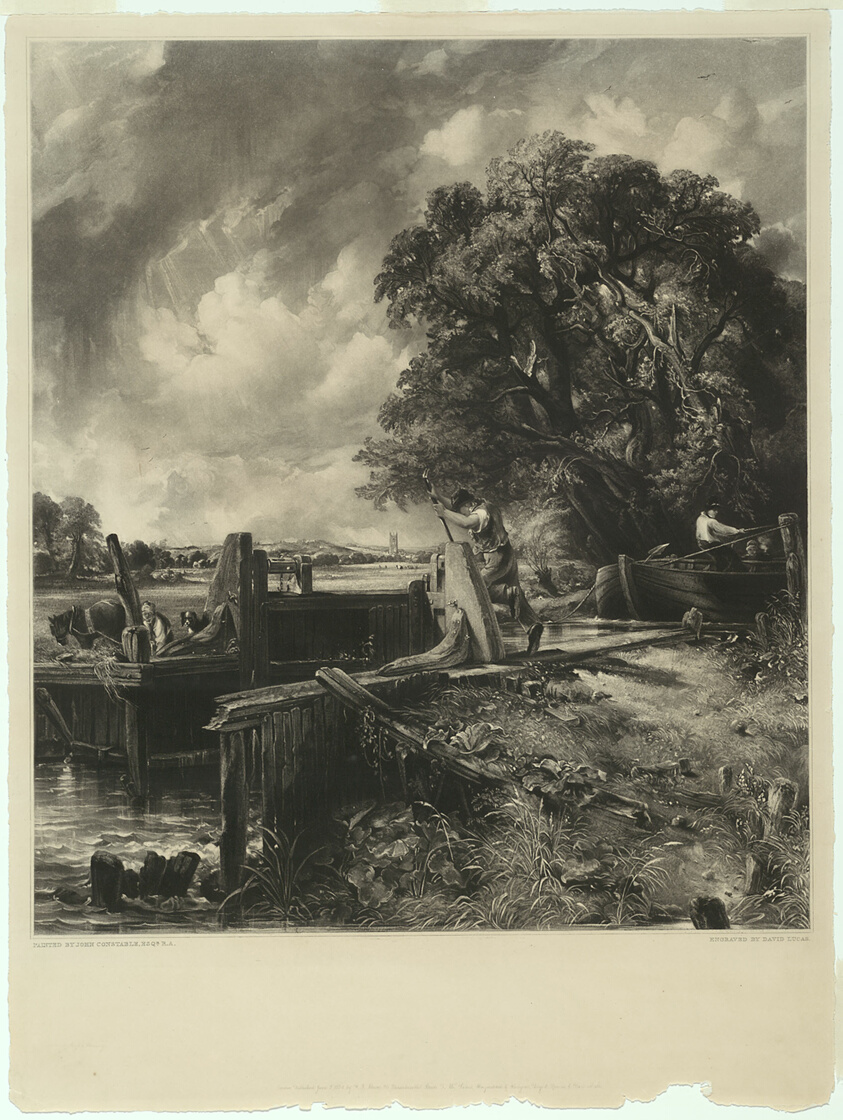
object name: Print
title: The Lock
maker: David Lucas (English, 1802-1881); after John Constable (English, 1776-1837)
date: 1832–34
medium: Mezzotint on cream wove paper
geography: England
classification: mezzotint; print; prints and drawing